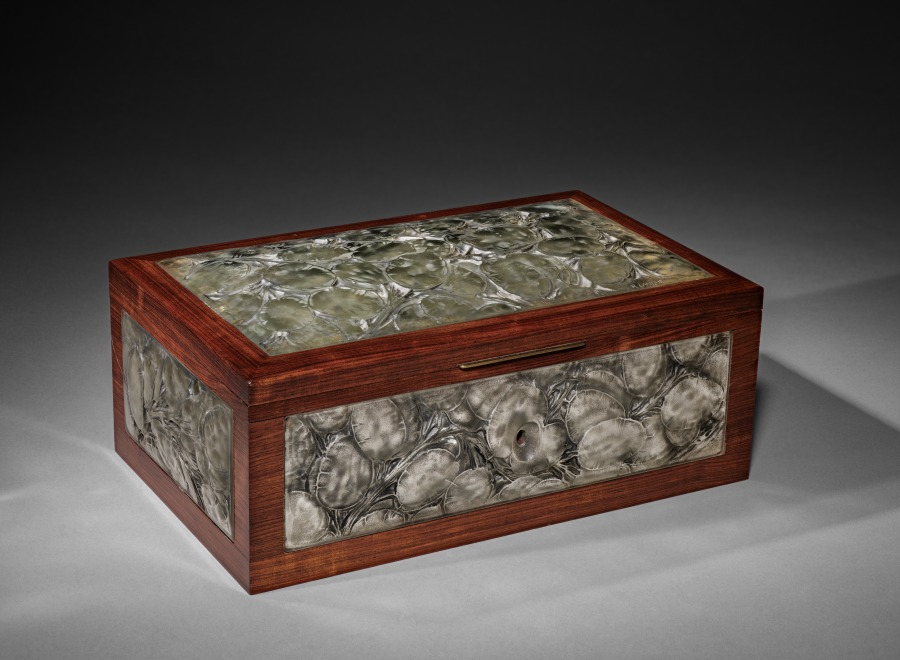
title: Monnaie du Pape Coffer (coffret)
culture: France, 20th century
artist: René Lalique (French, 1860–1945)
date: c. 1914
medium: wood, bombé glass panels with gray patina, metal key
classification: Mixed Media